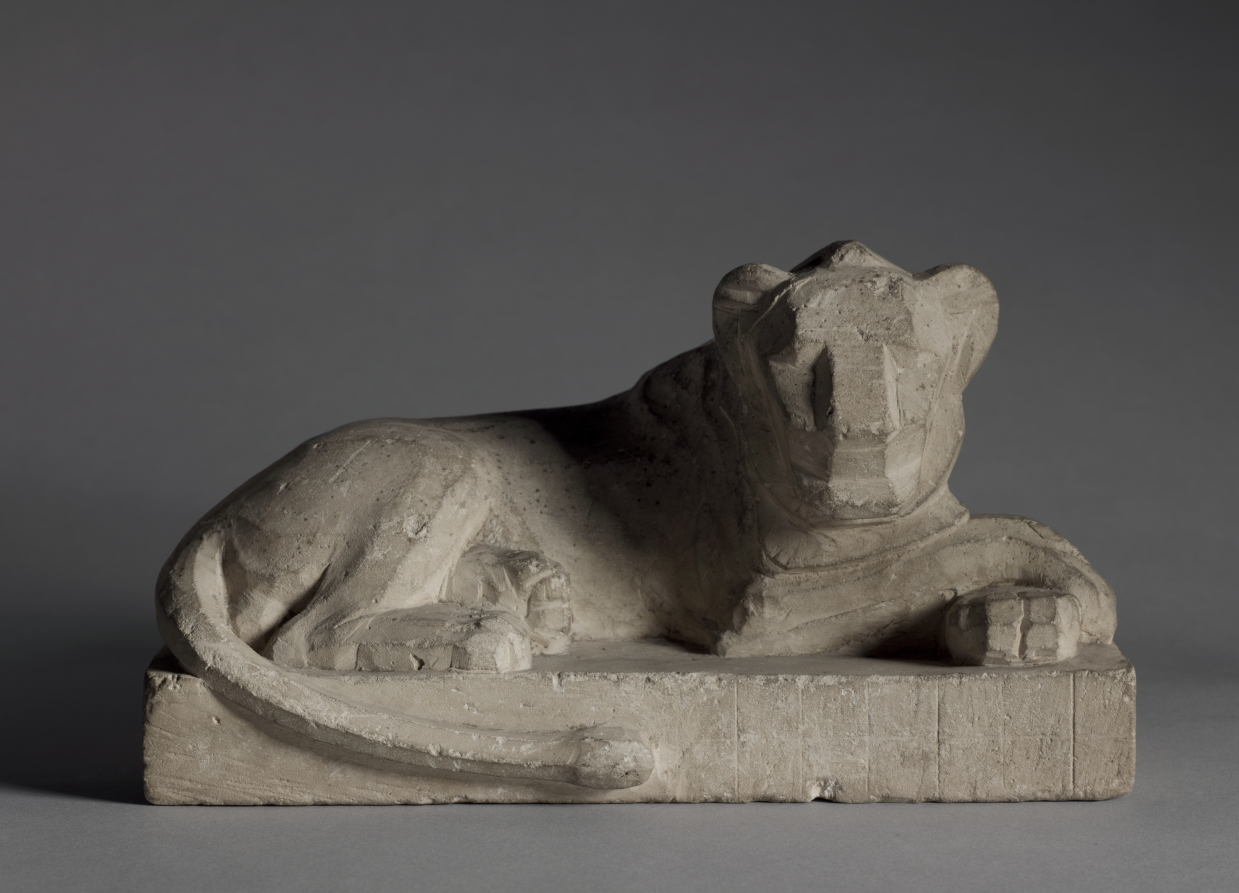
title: Statuette of a Lion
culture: Egypt, Late period (715–332 BCE), Dynasty 30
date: 380–246 BCE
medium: limestone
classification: Sculpture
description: Lions in Egyptian art are usually shown prone and relaxed, and usually represent the king. But this statuette probably represents the lion god Mahes who had a great temple at Leontopolis ("Lion-City") in the Delta where lions were kept. We know from classical authors that the temple maintained musicians to play to the lions to calm their nerves.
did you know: In antiquity, lions were often associated with rulers and this miniature sculpture likely depicts the Egyptian lion god Mahes. In ancient Egypt, a special city known as Leontopolis, or "Lion-City," had a temple dedicated to this deity in which live lions were kept. This small limestone sculpture would have been at home in such a location.